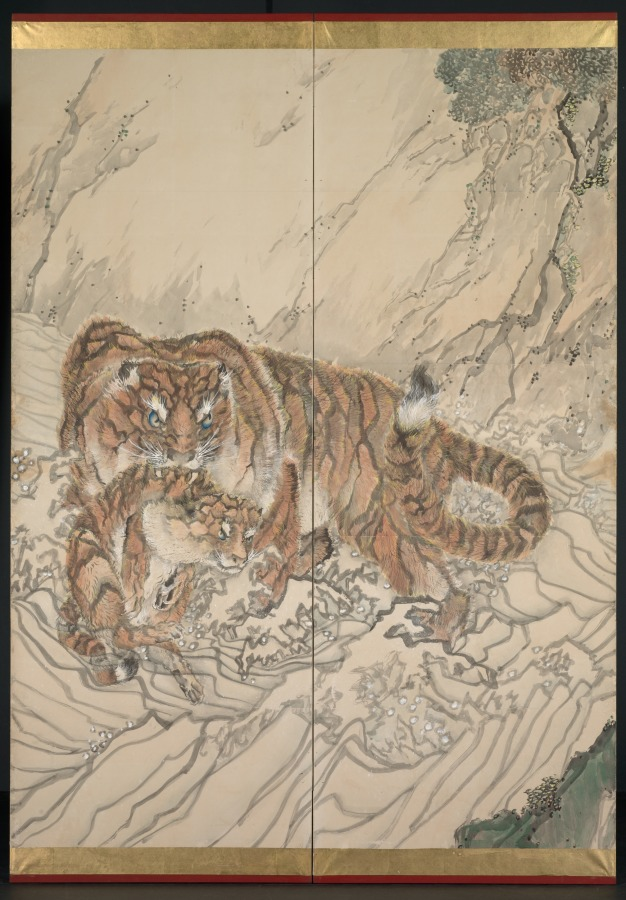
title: Tiger Family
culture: Japan, Edo period (1615–1868)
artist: Kishi Ganku (Japanese, 1749/56–1838)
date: early 1800s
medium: One of a pair of six-panel folding screens; ink and color on paper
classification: Painting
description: By the time this self-taught painter reached his thirties, his paintings were keenly sought after by Kyoto’s sophisticated patrons, including members of the imperial family. Judging from the surviving works, his supporters delighted in the colorful, auspicious imagery of Chinese historical figures, blossoming plum trees, cranes, peacocks, roosters, and especially tigers. Kishi Ganku was originally from the coastal town of Kanazawa, but relocated to Kyoto to work for the Arisugawa family. His work incorporates stylistic elements from the Kano school, the Maruyama school, and works by the Chinese artist Shen Nanping (1682–1760).